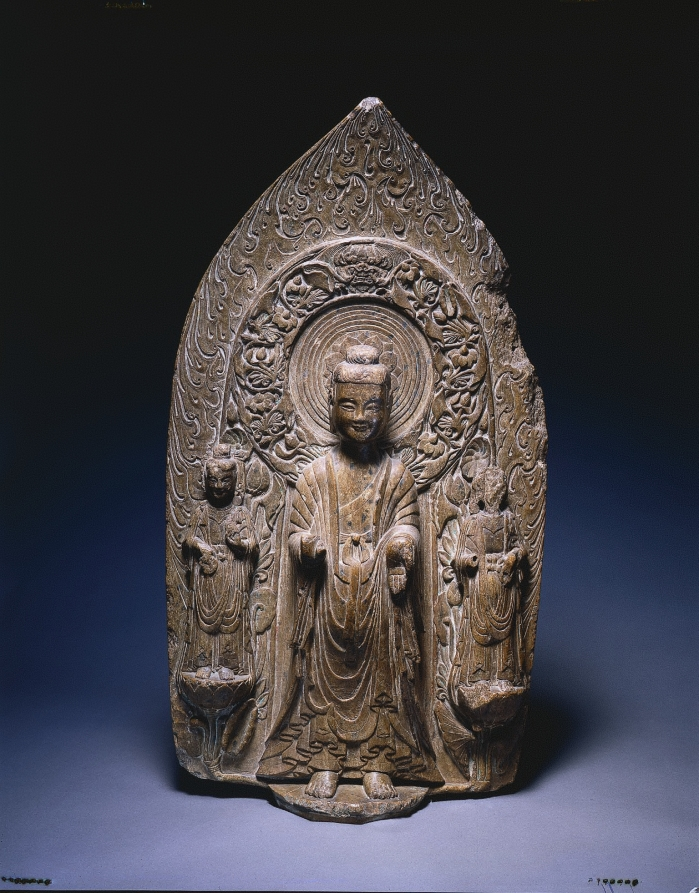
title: Stele with Sakyamuni and Bodhisattvas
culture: China, Hebei province, Eastern Wei dynasty (534-550)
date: 537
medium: limestone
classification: Sculpture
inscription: Fully inscribed on reverse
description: According to the inscription, this stele was commissioned in 537 by Yuan'ning, prince of the Gaoping branch of the imperial Wei family, in memory of his deceased consort, in the hope that it would bring her to the Western paradise. It was carved by one of the finest craftsmen in the Eastern Wei capital of Ye in Hebei province. Here, the Buddha's robe shows a careful arrangement of patterned drapery (large U-shaped folds and scallop-shaped folds at the hem), combining linear rhythms with an ordered symmetry. Soaring flames edge the mandorla (almond-shaped halo), echoing the linear eloquence of Chinese painting.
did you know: Traces of polychrome paints remaining in the interstices of the carving, particularly on the foliate carving around Shakyamuni, suggest the stele was originally brightly colored.